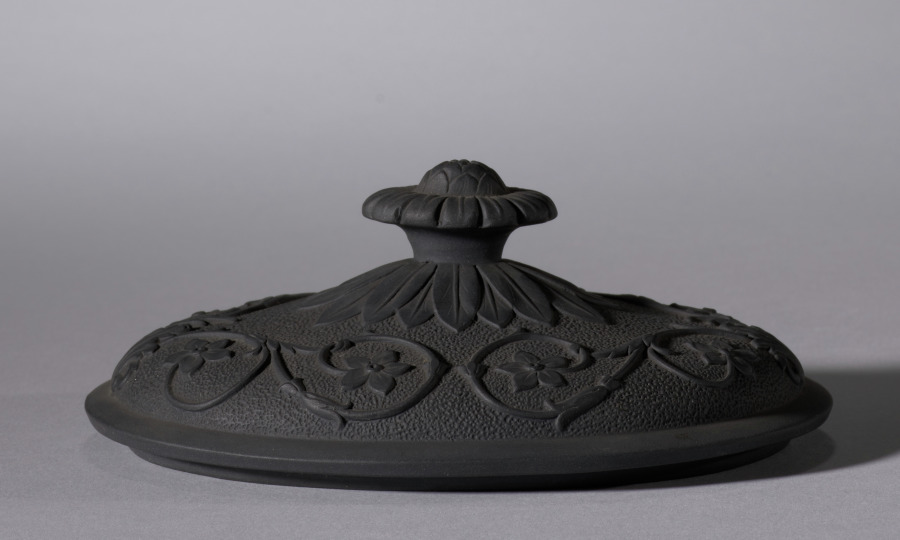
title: Teapot (cover)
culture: England, 19th century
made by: Elijah Mayer (British, c. 1770–1805)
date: c. 1810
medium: black basalt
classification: Ceramic